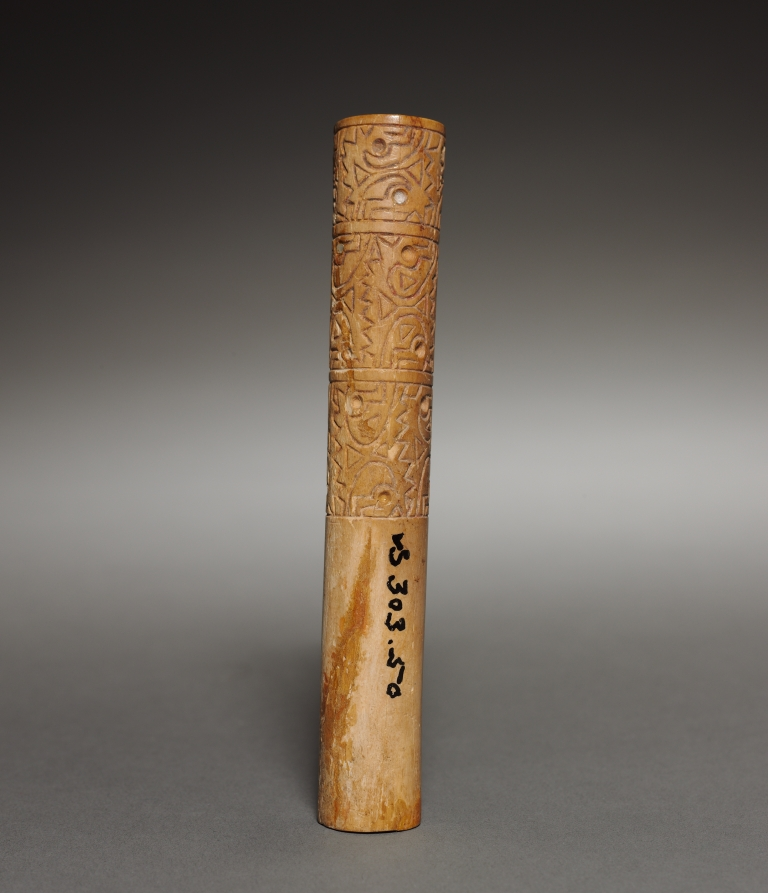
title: Ear Ornament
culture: Peru, Moche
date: 200–550 CE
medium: incised bone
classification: Jewelry